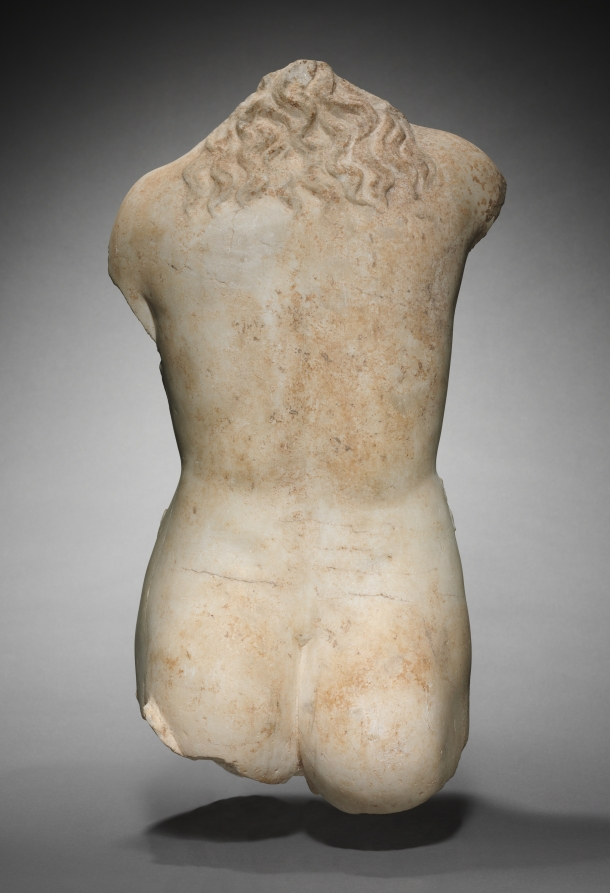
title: Aphrodite Torso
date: 200–1 BCE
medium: Thasian marble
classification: Sculpture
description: This torso can be identified through its nudity and pose as the Greek goddess of love, Aphrodite. Based on the now-lost Aphrodite of Knidos, a revolutionary marble sculpture created by Praxiteles of Athens in the mid-300s BCE, this sculpture belongs to a popular Greek and Roman type showing the goddess at her bath. With hips slightly shifted, she stood in a relaxed posture with most of her weight on one leg, probably with one hand modestly covering her pubic region and the other shielding her breasts or holding drapery. Alternatively, one or both hands may have tended to her wet hair, some of which falls over her neck and upper back.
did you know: This torso is based on the Aphrodite of Knidos, a Greek original by the master sculptor Praxiteles.